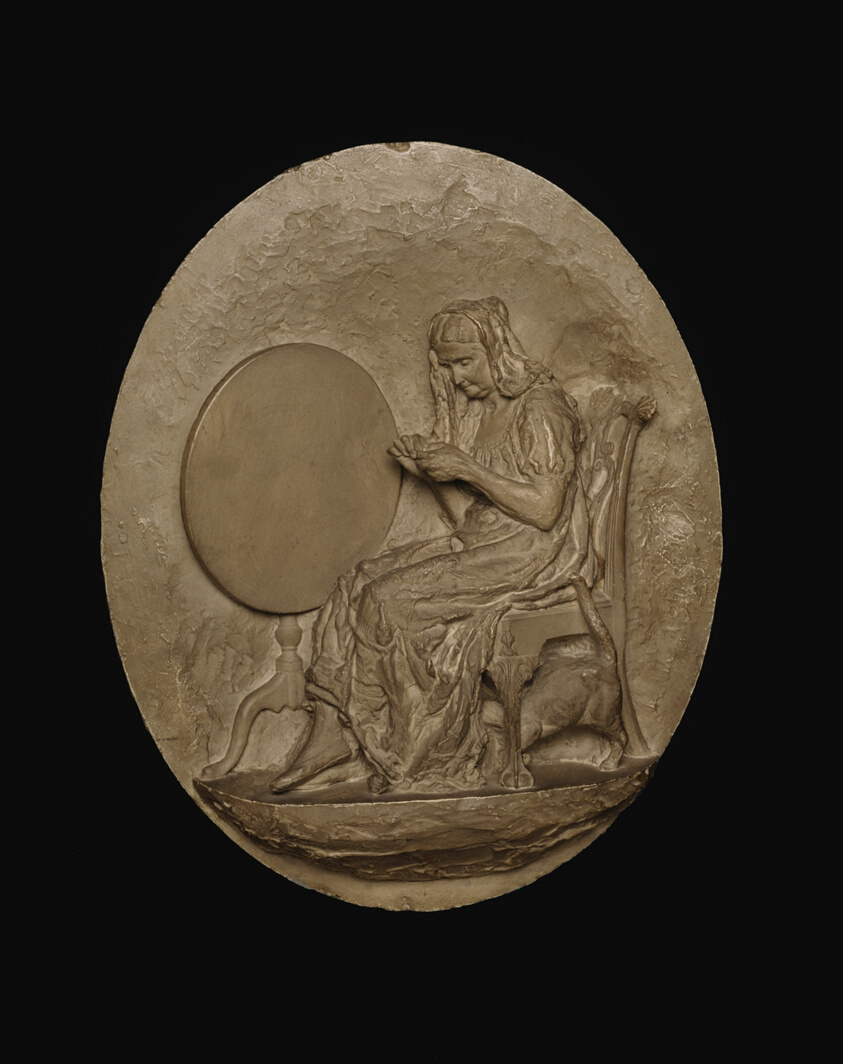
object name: Sculpture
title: Knitting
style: Realism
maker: Thomas Eakins (American, 1844–1916)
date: Modeled 1882–83, cast c. 1886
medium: Painted plaster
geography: Philadelphia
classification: sculpture; american arts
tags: people, portraits